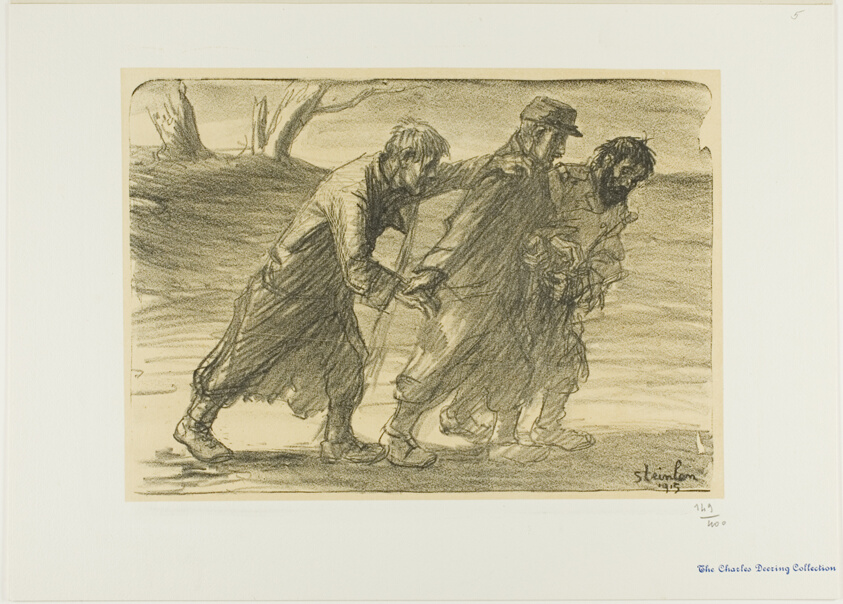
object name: Print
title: Three Comrades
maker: Théophile-Alexandre Steinlen; French, born Switzerland, 1859-1923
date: 1915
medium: Lithograph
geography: France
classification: lithograph; print; prints and drawing